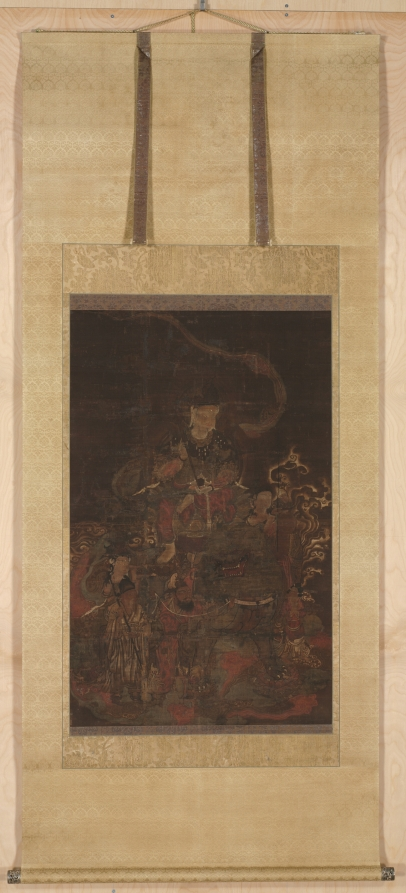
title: Monju Riding Lion with Attendants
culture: Japan, Kamakura period (1185–1333)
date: 1200s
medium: Hanging scroll; ink and color on silk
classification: Painting